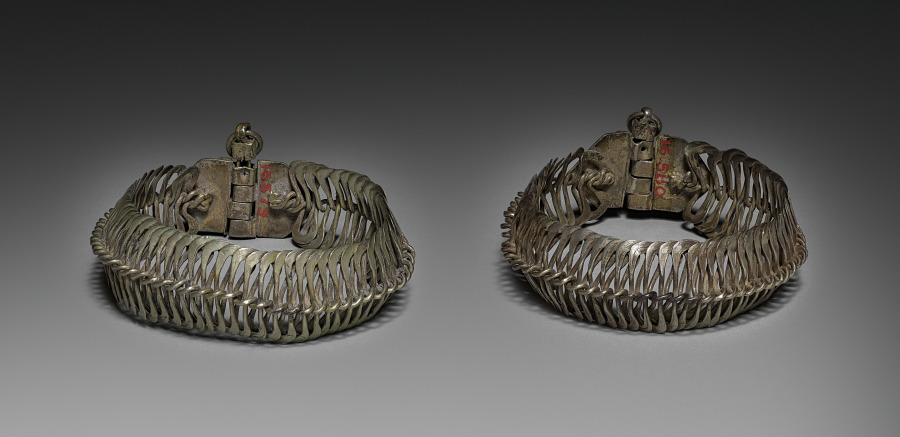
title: Bracelets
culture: India (?)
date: 1800s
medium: silver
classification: Jewelry